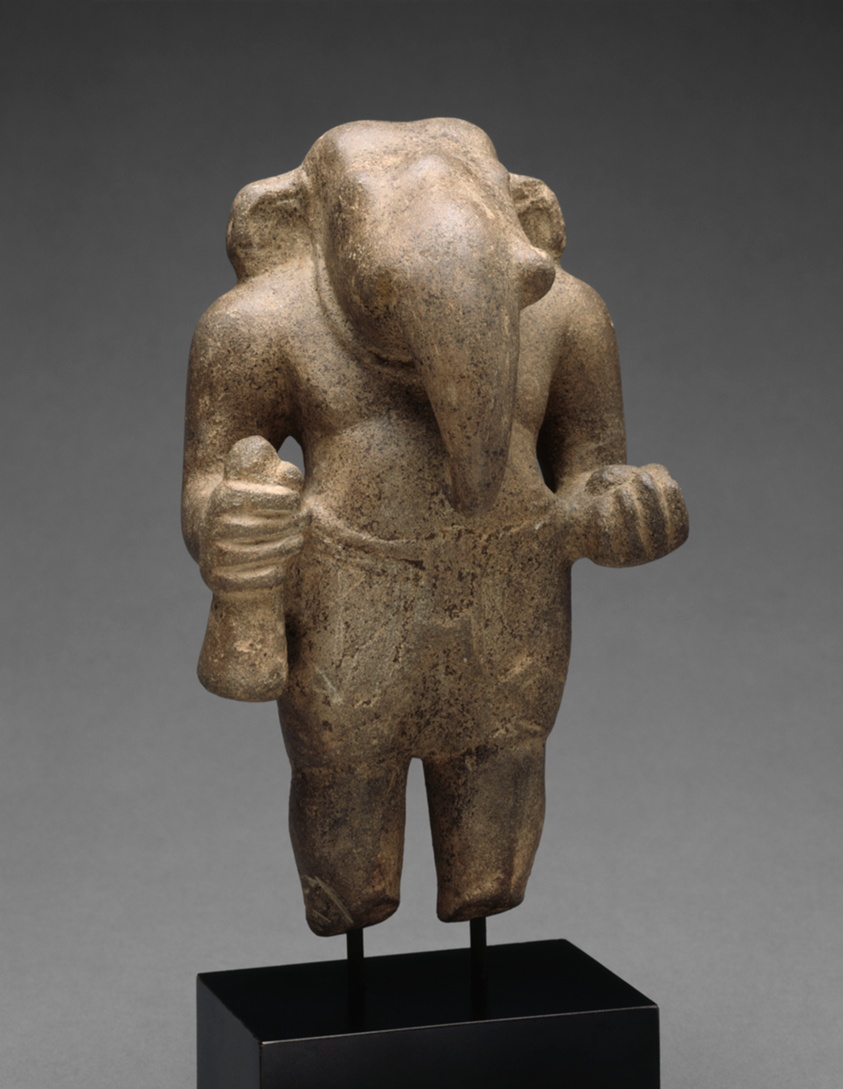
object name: Sculpture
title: God Ganesha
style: Southeast Asian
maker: Cambodia or Vietnam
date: Pre–Angkor period, 7th/8th century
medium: Sandstone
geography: Cambodia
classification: sandstone; stone; sculpture; asian art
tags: Ganesha, gods (deities), religion